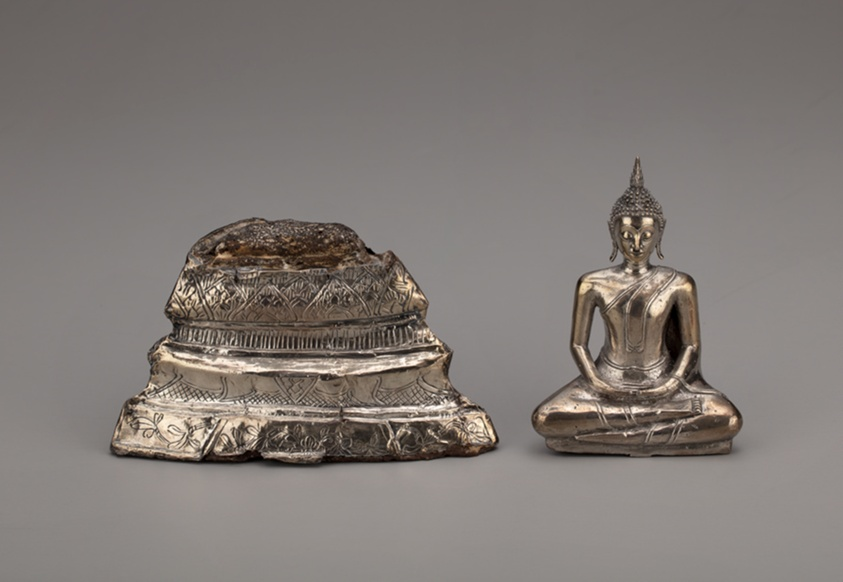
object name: Sculpture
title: Buddha Seated in Meditation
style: Southeast Asian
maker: Thailand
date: 19th century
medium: SIlver, cast with base worked in repoussé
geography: Thailand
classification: silver; metal; sculpture; asian art